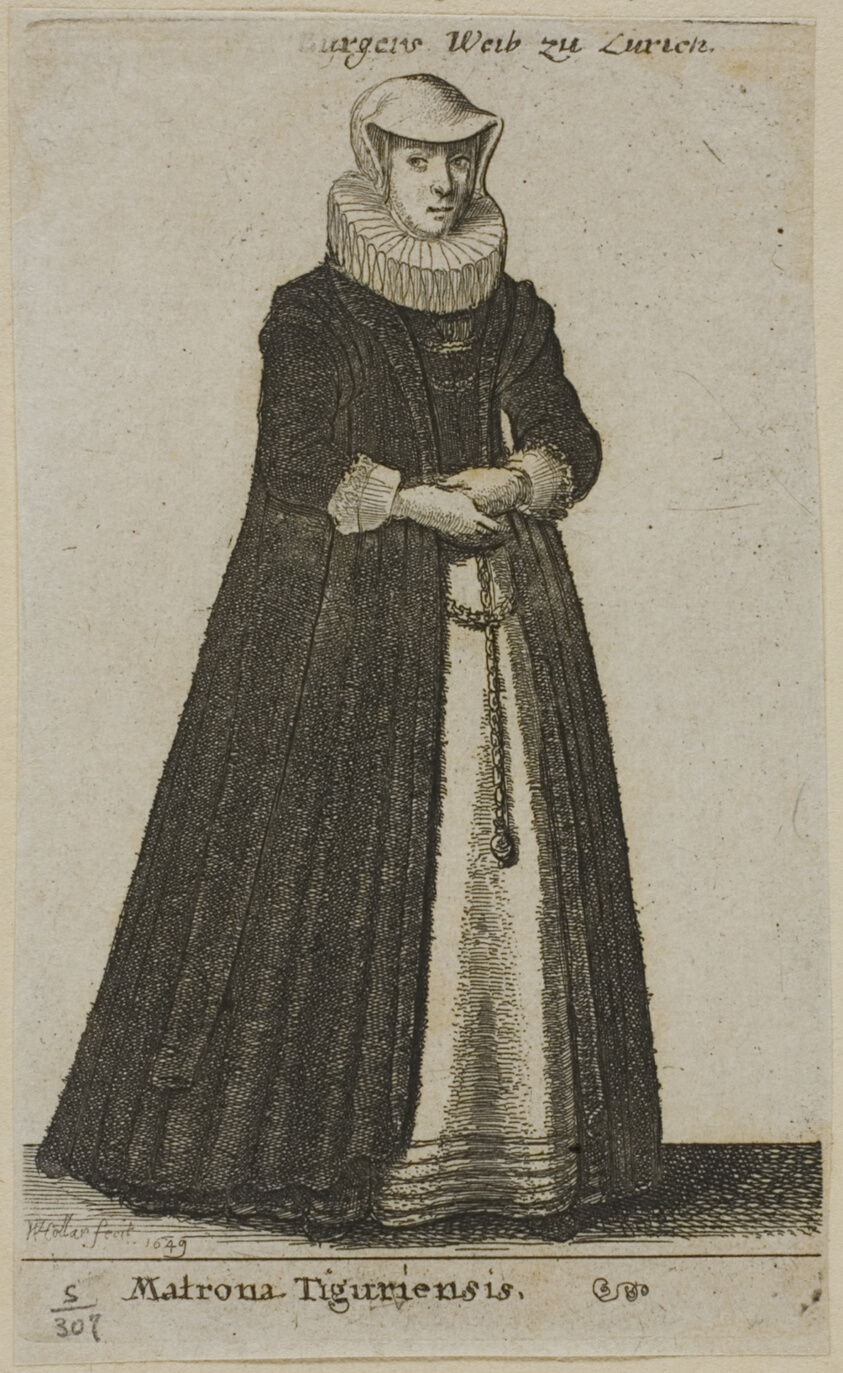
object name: Print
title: Burgher's Wife of Zurich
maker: Wenceslaus Hollar (Bohemian, 1607-1677)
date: 1649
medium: Etching on gray Asian paper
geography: Bohemia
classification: etching; print; prints and drawing